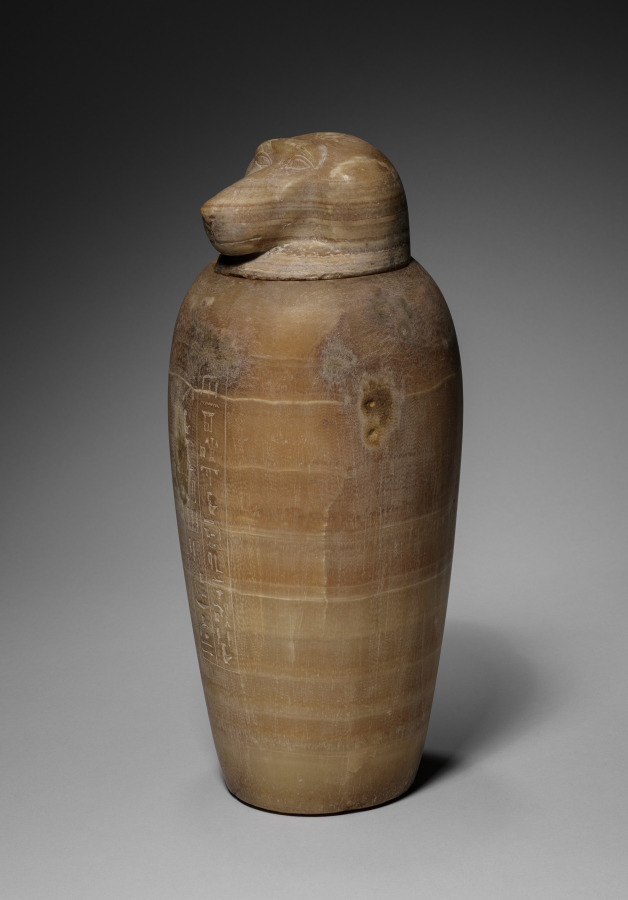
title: Canopic Jar with Baboon's Head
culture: Egypt, Late period (715–332 BCE), Dynasty 26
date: 664–525 BCE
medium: travertine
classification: Funerary Equipment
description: In the process of mummification, the liver, lungs, stomach, and intestines were removed, separately embalmed, and stored in specialized jars known as canopic jars (after a sailor in Greek mythology, who died at the town of Canopus in the Nile Delta and was worshipped there in the form of a human-headed jar). Each organ was identified with one of four funerary deities collectively known as the Sons of Horus: the liver with Imsety (man's head), the lungs with Hapy (baboon's head), the stomach with Duamutef (jackal's head), and the intestines with Qebehsenuef (falcon's head). It was their duty to protect the deceased and restore to him his body parts in the hereafter.